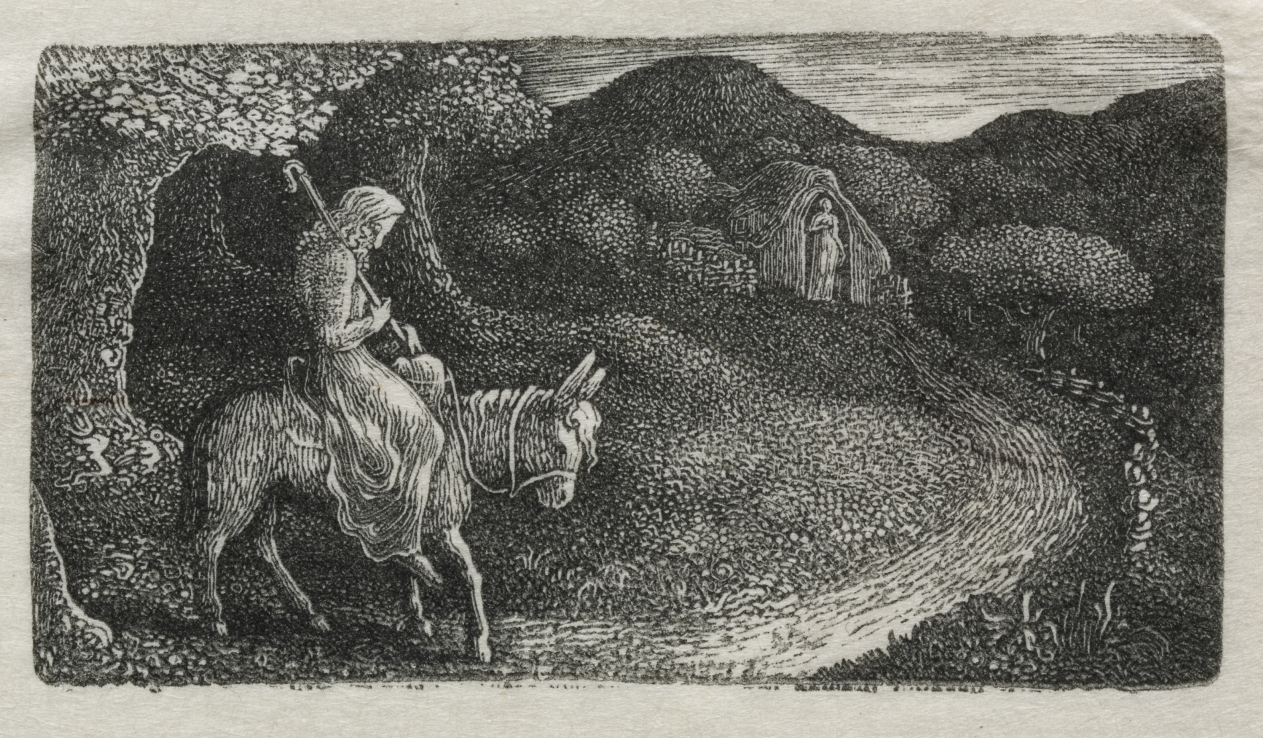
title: The Return Home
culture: England, 19th century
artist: Edward Calvert (British, 1799–1883)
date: 1829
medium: wood engraving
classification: Print